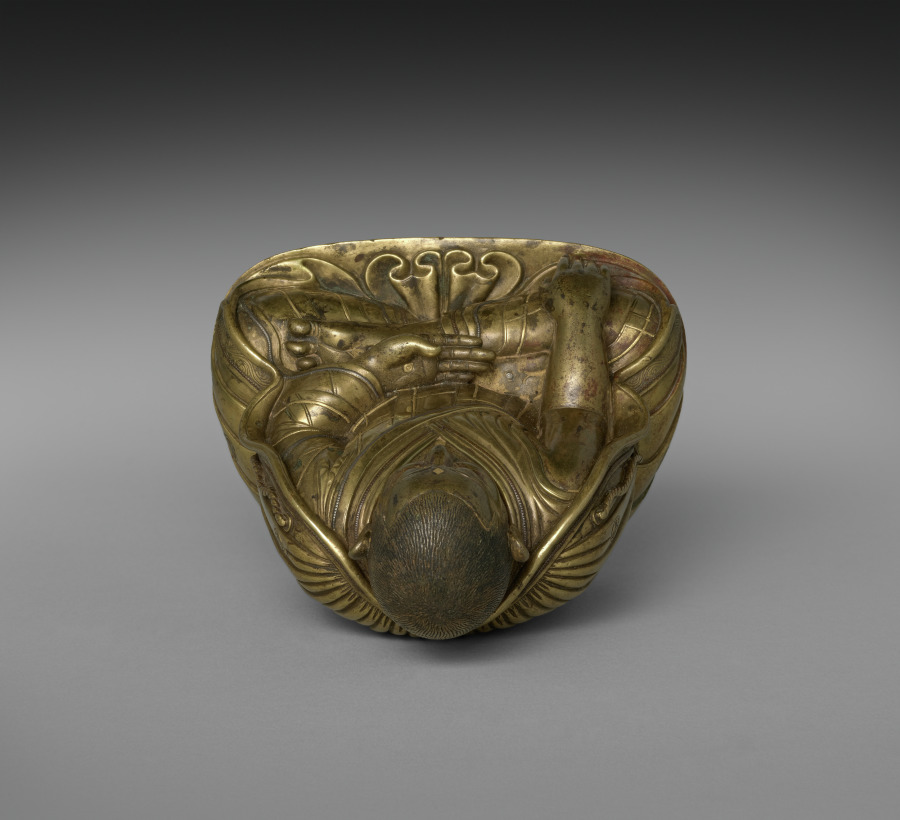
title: Portrait of Phagmo Drupa Dorje Gyalpo (1110–1170)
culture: Central Tibet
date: 1200s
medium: gilt bronze with gold, silver, copper, turquoise, lapis, and coral inlay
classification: Sculpture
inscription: / / Na mo 'ghu ru / / Ngan lam ban chung bdag gis ni / / bla ma Rin chen sku bzhengs pa yi / / bsod nams 'di yi byin brlabs kyis / / 'gro drug sdug sngal zad par shog / / Translation: "Salutations to the master ! May the sufferings of the six kinds of beings be appeased through the blessing of merit gained by me, the little monk of Ngan.lam, in having this statue of the Lama Rin.chen made."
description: This portrait statue depicts the first monastic leader of the prominent Buddhist monastery of Densatil, an influential early leader of the Tibetan Buddhist monastic order called Kagyu, famous for his views on the importance of meditation. He sits on a lotus pedestal and lion throne, like a Buddha, and his hand positions (mudras) communicate that meditation leads to enlightenment.